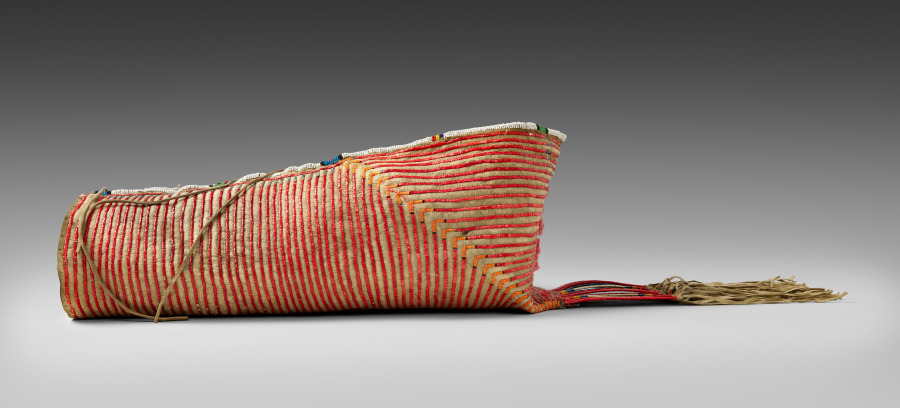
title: Cradle Board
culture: America, Native North American, Lakota (Sioux), Post-Contact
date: c. 1900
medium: leather, quills, beads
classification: Leather